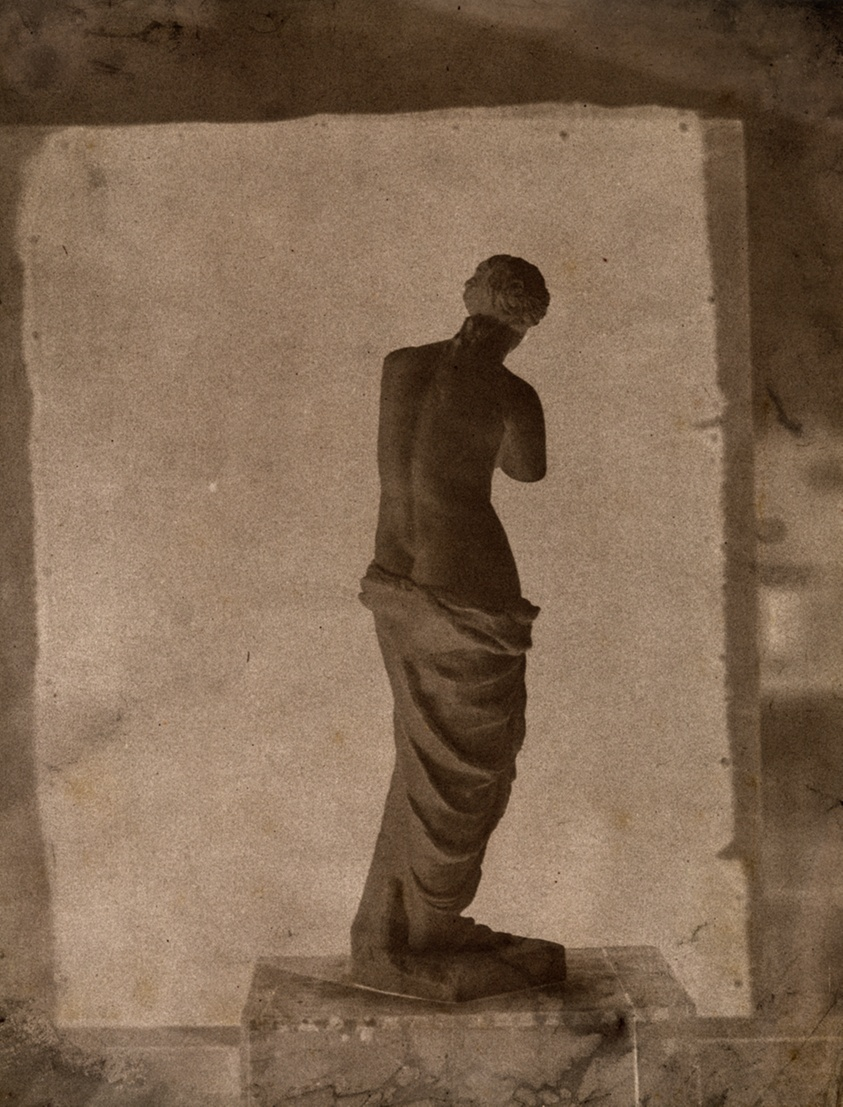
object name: Photograph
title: Untitled (Still life with a statuette of the Venus de Milo)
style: 19th century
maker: John Beasley Greene (American, born France, 1832–1856)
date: 1852-53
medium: Waxed paper negative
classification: photography; photograph; photographic process; black-and-white photography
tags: sculptures